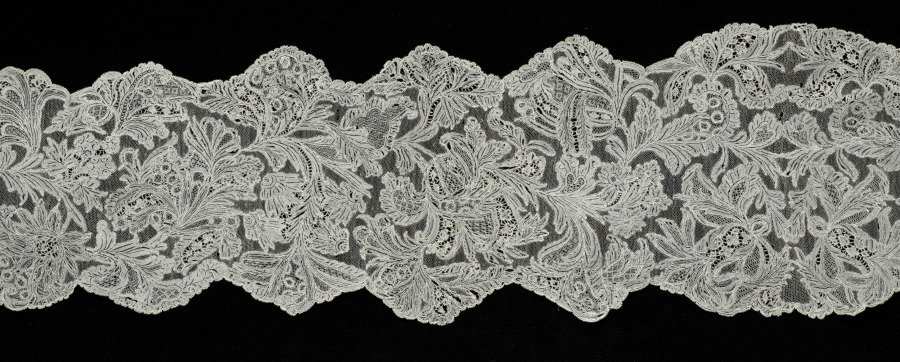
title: Lace Lappet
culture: Italy, Venice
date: 1700–1740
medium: Needle lace (Grounded Venetian Point)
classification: Lace